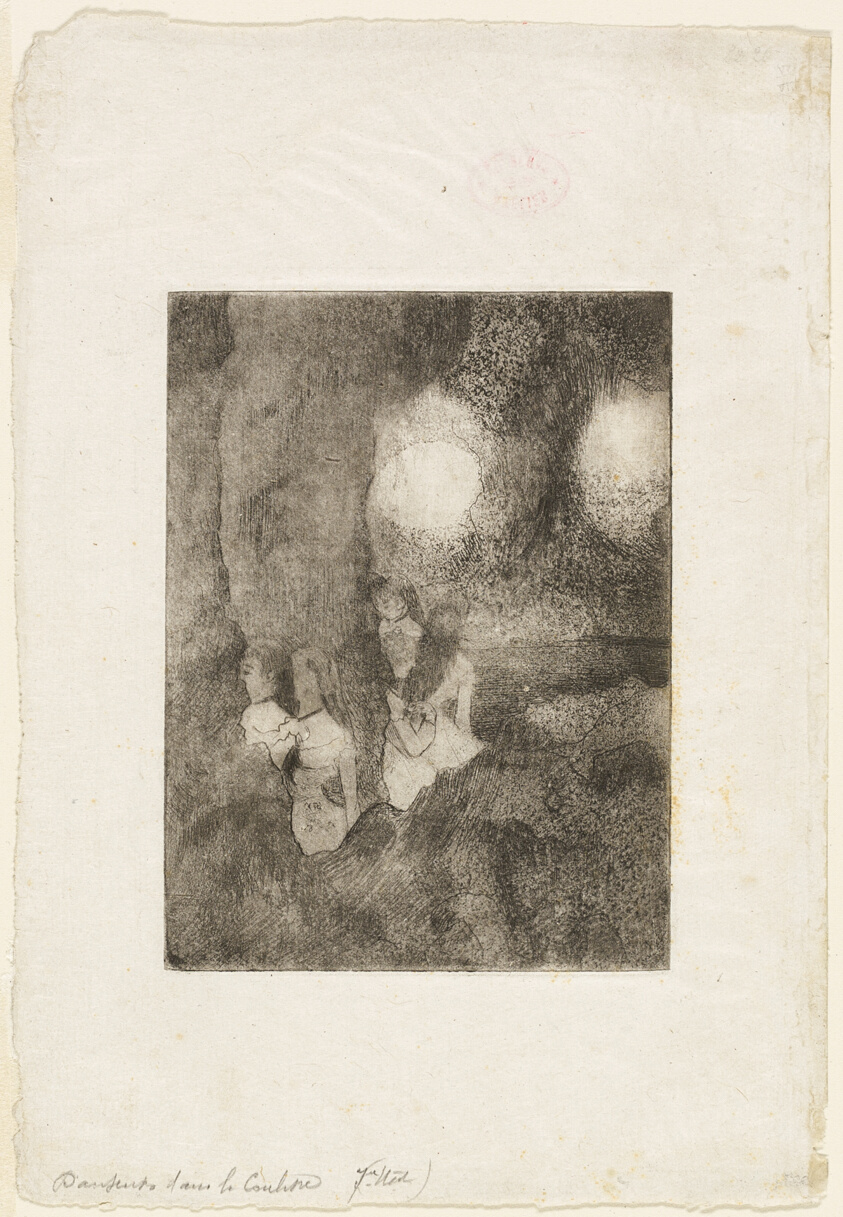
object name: Print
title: Dancers in the Wings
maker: Edgar Degas; French, 1834-1917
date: 1879–80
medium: Etching, aquatint and drypoint on ivory loose chine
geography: France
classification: etching; print; prints and drawing; paper